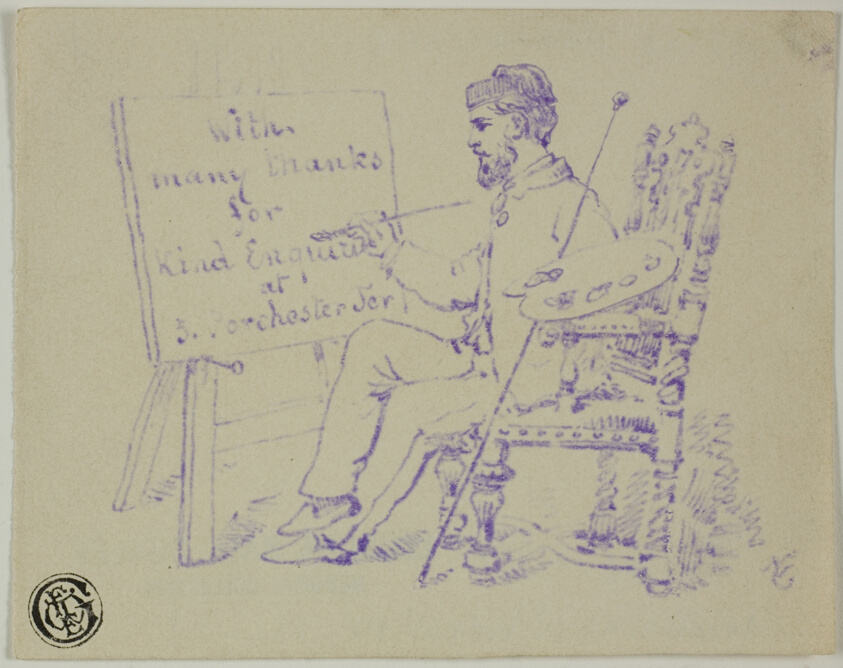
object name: Drawing and Watercolor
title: Artist Seated at Easel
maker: Nicholas Chevalier (Australian, 1828-1902)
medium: Pen and purple ink on ivory laid paper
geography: Australia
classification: pen and ink drawings; drawings (visual works); prints and drawing